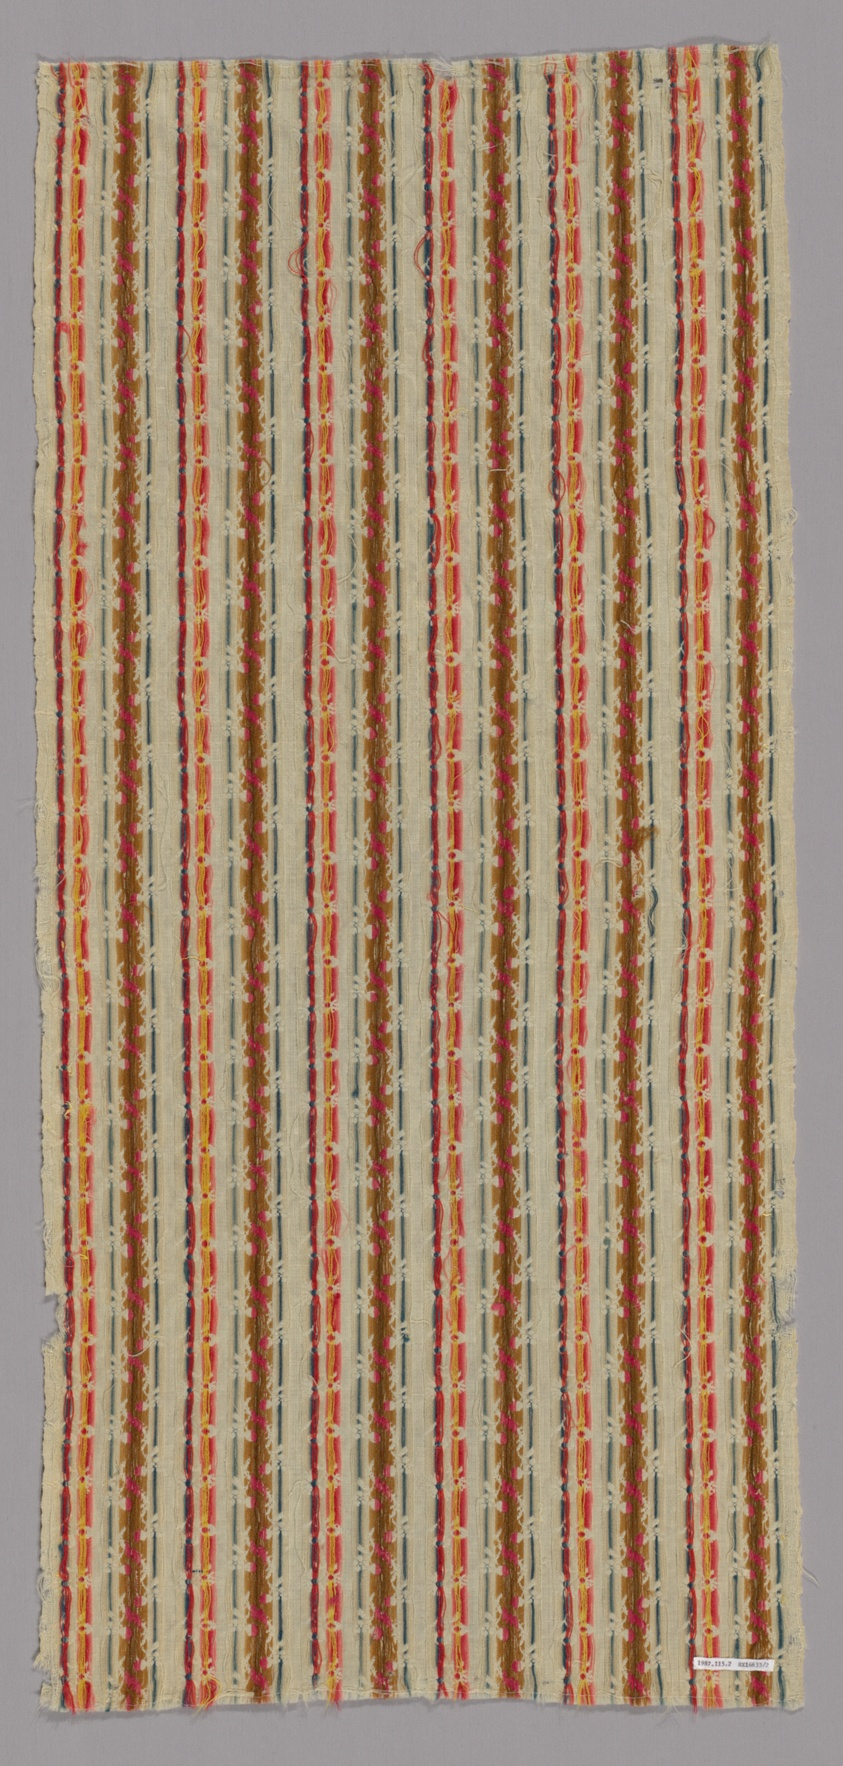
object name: Textile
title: Panel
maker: England or France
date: 18th century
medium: Wool, plain weave with supplementary patterning warps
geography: England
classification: textile; weaving; furnishing textile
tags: flowers